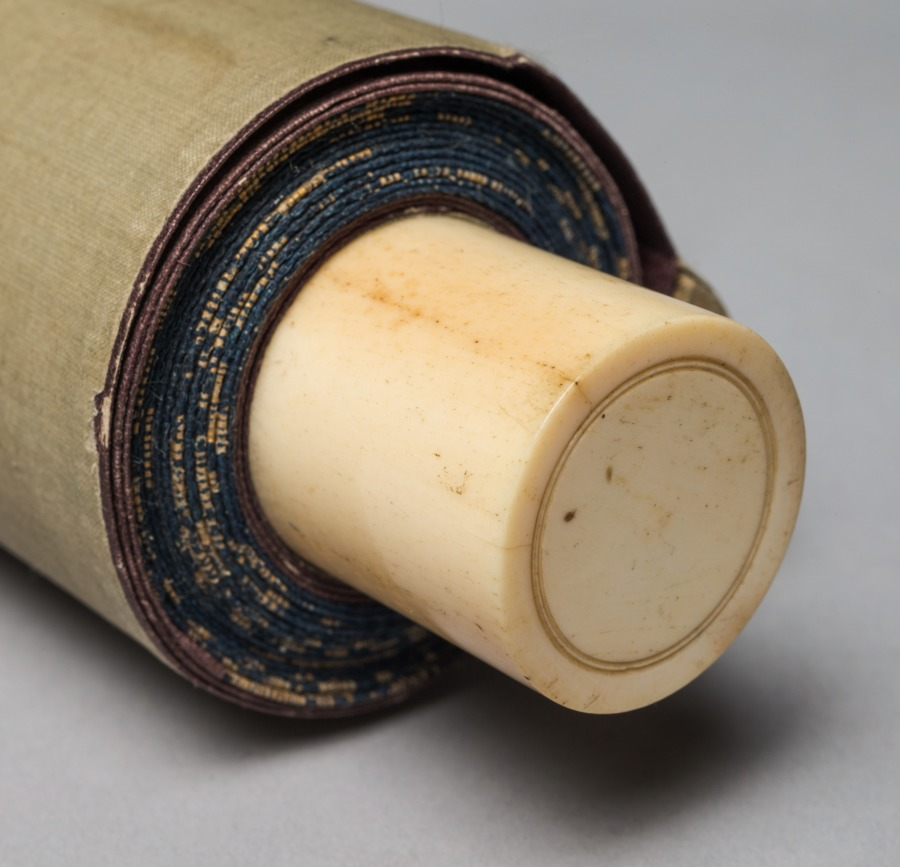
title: Monkeys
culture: Japan, Edo period (1615–1868)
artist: Gyokutei Katsu (Japanese)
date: c. 1800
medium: hanging scroll; ink on paper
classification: Painting